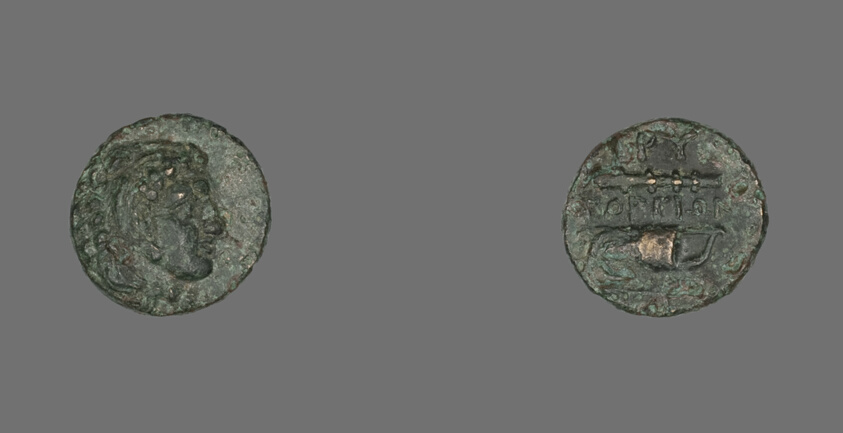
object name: Coin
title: Coin Depicting the Hero Herakles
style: greek, ancient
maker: Greek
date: 387-300 BCE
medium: Bronze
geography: Ancient Greece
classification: coin; ancient art